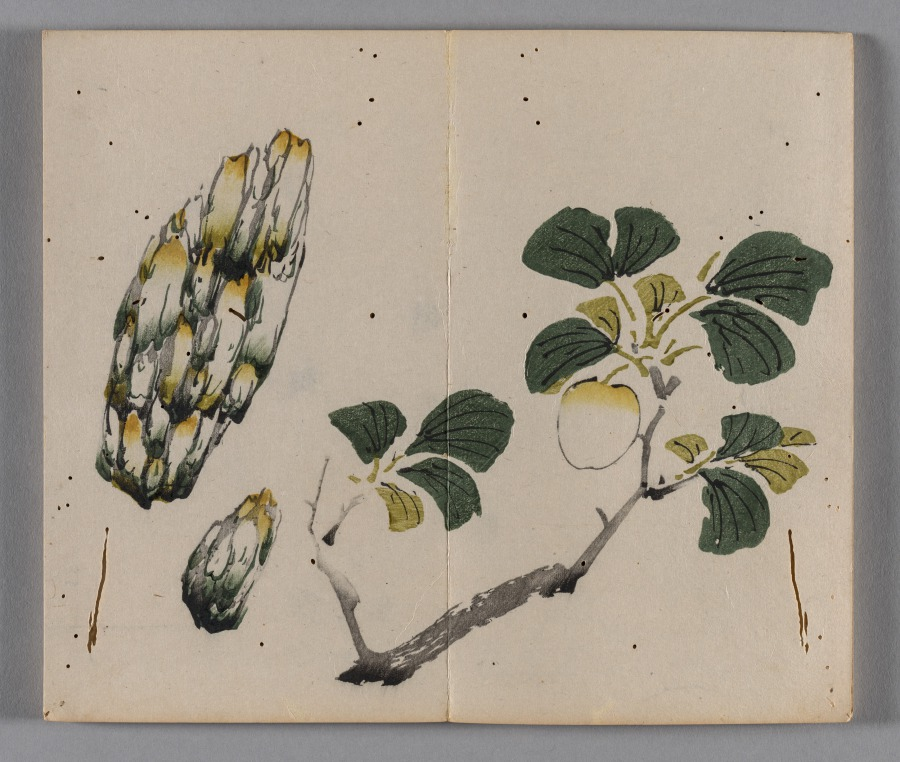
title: Ten Bamboo Studio Painting and Calligraphy Handbook (Shizhuzhai shuhua pu): Fruit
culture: China, Qing dynasty (1644-1911)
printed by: Hu Zhengyan (Chinese, c. 1584–1674)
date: 1633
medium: Woodblock-printed book; ink and colors on paper; first edition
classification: Print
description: Color printing reached a level of perfection in the early 1600s, as seen in this Ten Bamboo Studio Collection of Calligraphy and Painting and the Mustard Seed Garden Manual of Painting (printed 1679 and 1701). The painterly quality, precision in registering (aligning) the woodblocks, and harmonious colors made them the most successful color print editions in Chinese history. Both editions were printed and compiled in Nanjing, spread nationwide, and had a great impact on the arts in Japan and Korea.